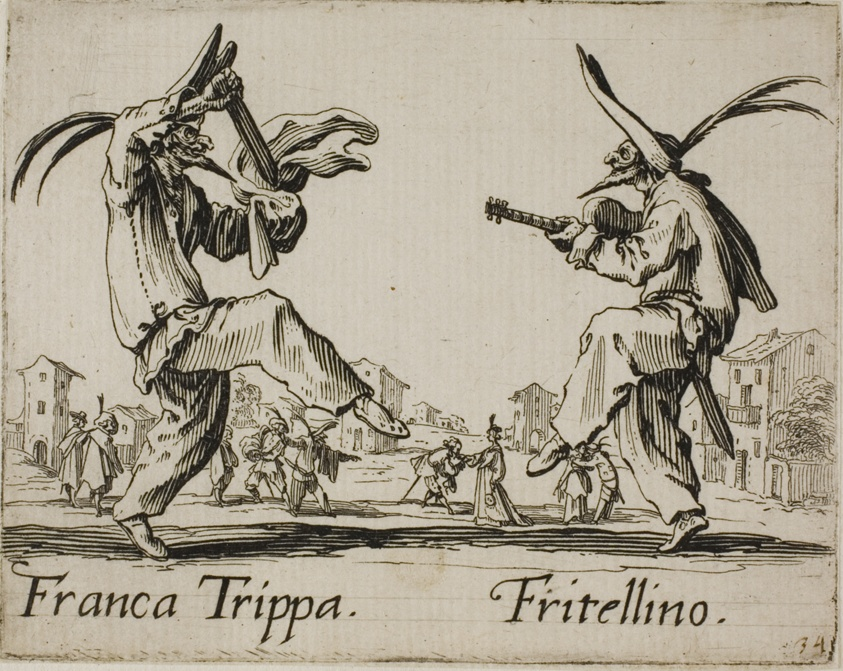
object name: Print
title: Franca Trippa - Fritellino, plate 23 from Balli di Sfessania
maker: Jacques Callot (French, 1592-1635)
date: c. 1622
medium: Etching and engraving on paper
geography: France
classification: etching; print; prints and drawing